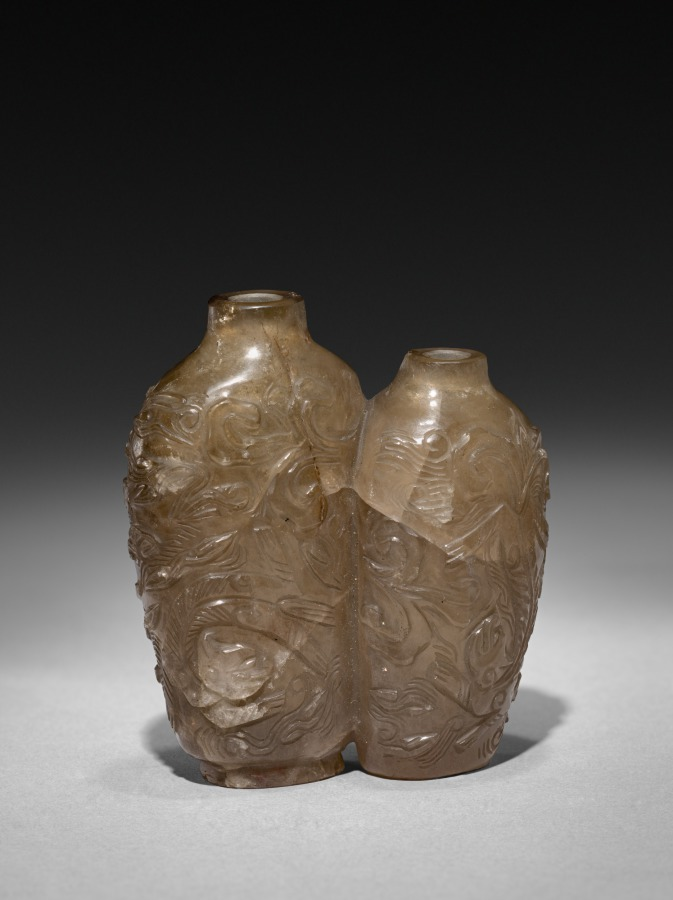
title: Snuff Bottle - Double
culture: China, Qing dynasty (1644-1911)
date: 1644–1911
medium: glass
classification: Glass